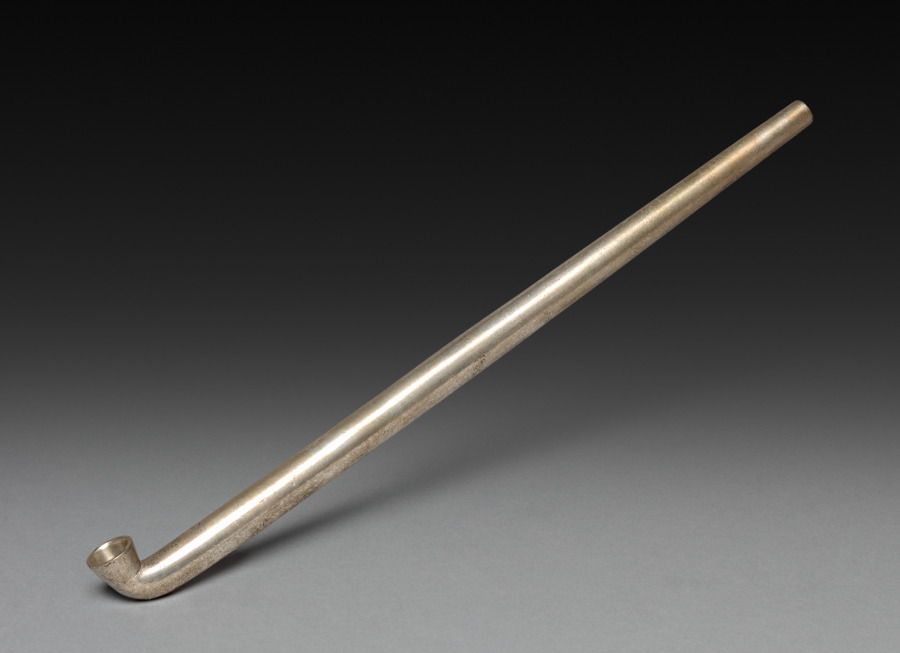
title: Tobacco Pipe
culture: Japan, Edo period (1615–1868) to Meiji period (1868–1912)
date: 1800s–early 1900s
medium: silver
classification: Miscellaneous